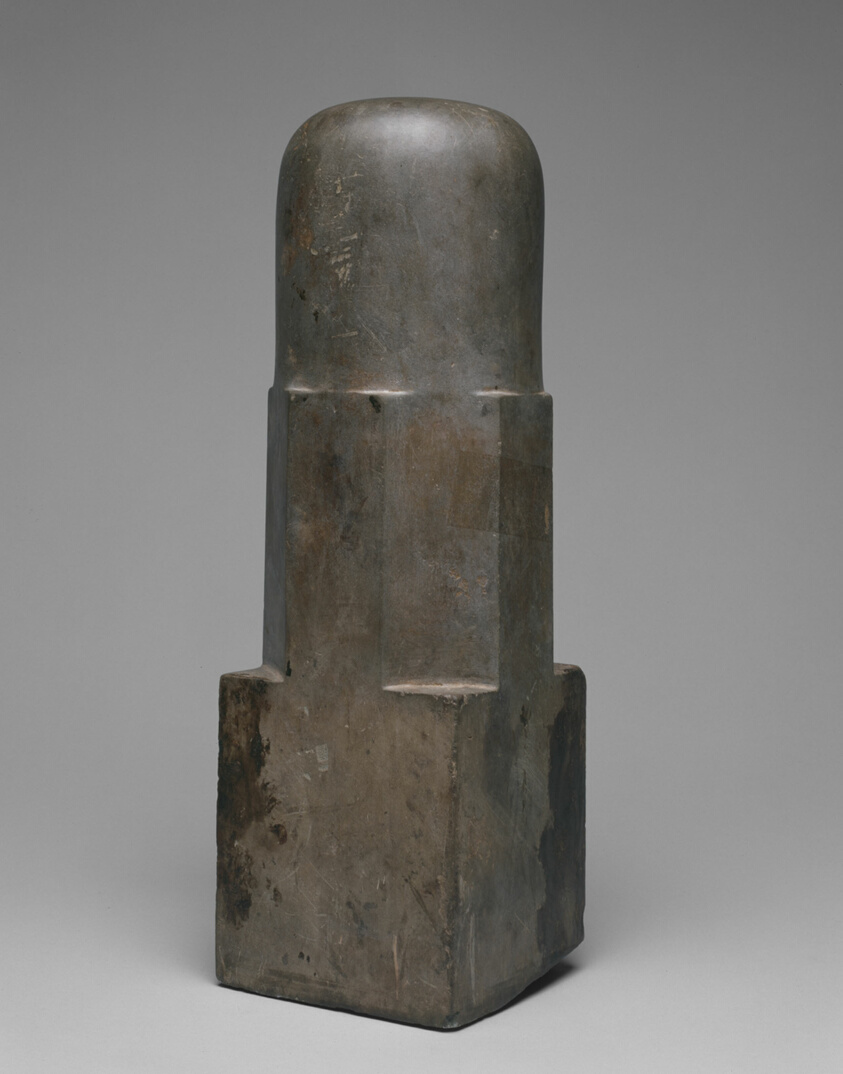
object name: Religious/Ritual Object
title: Emblem of the God Shiva (Linga)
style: Southeast Asian, angkorean, cambodian, asian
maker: Cambodia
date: Angkor period, 10th–13th century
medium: Sandstone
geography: Cambodia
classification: sandstone; stone; sculpture; asian art; ritual objects